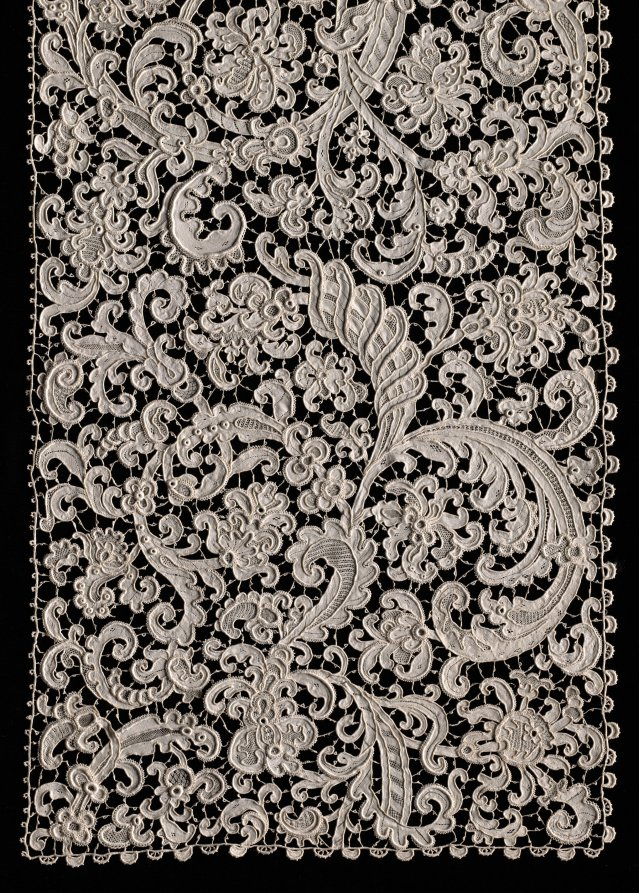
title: Lace Flounce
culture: Italy, Venice, 1650-1699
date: 1650–99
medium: Linen: needle lace (Venetian Raised Point)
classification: Lace